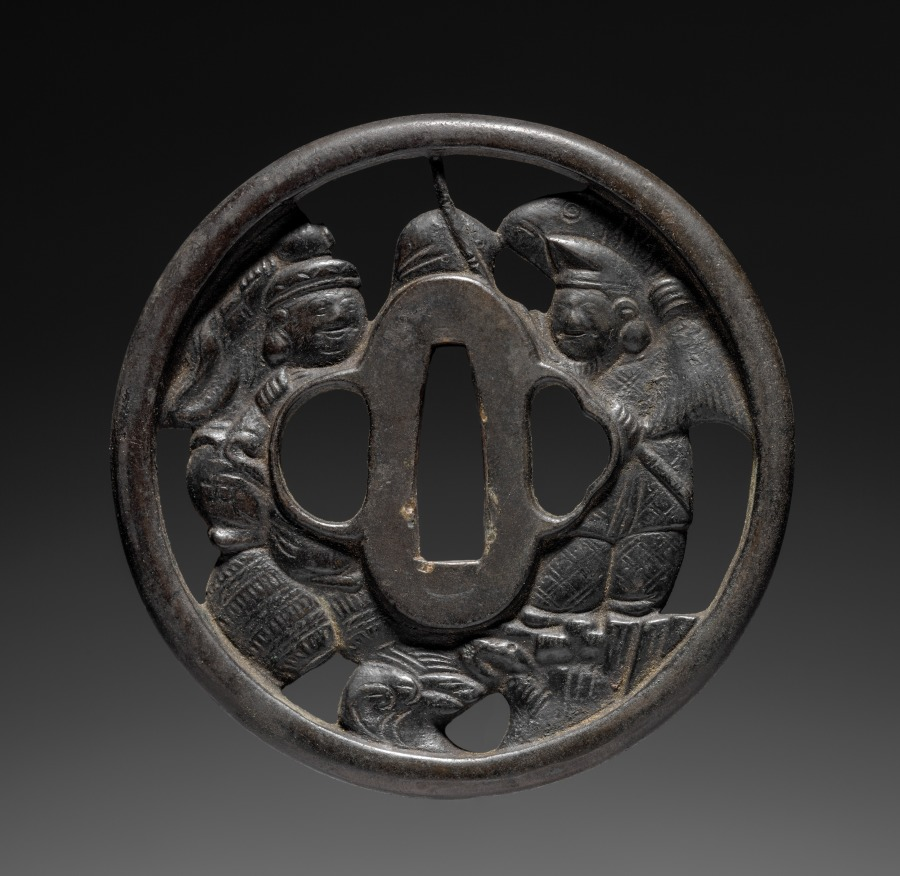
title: Sword Guard (Tsuba) with Daikokuten and Ebisu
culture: Japan, possibly Edo period (1615-1868)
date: c. 1615–1868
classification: Arms and Armor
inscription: signed: 山城住正吉 花押